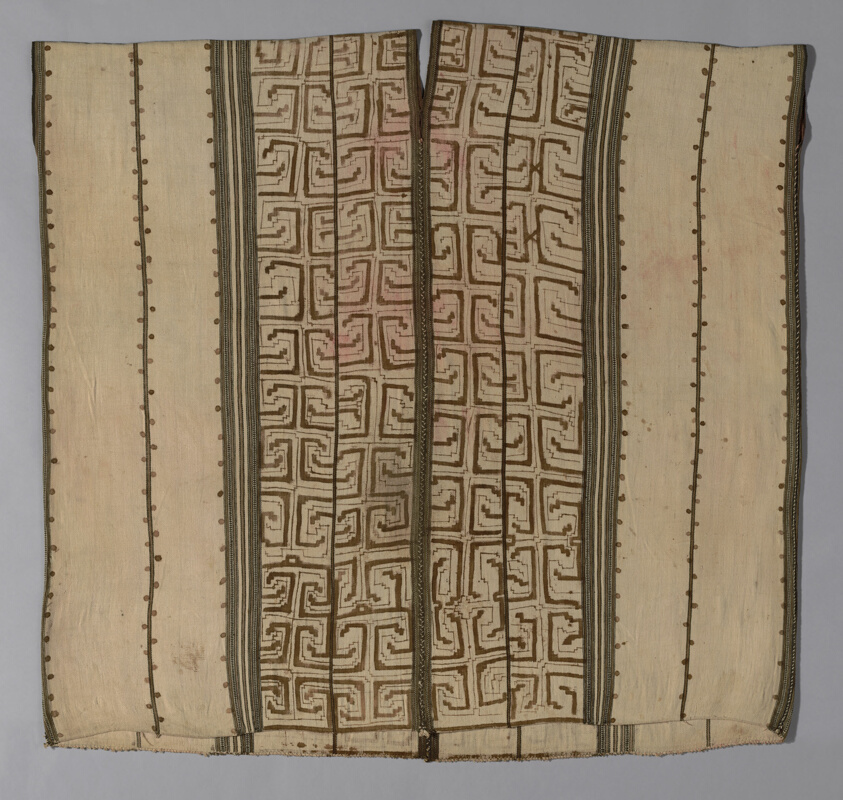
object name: Costume and Accessories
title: Tunic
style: peruvian, conibo, peru, shipibo, south american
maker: Shipibo-Conibo; Peru, Ucayali, Possibly Pucallpa region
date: c. 1900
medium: Cotton, plain weave; painted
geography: Peru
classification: tunic; weaving - printed; weaving; textile; costume; costume - weaving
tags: geometric motif